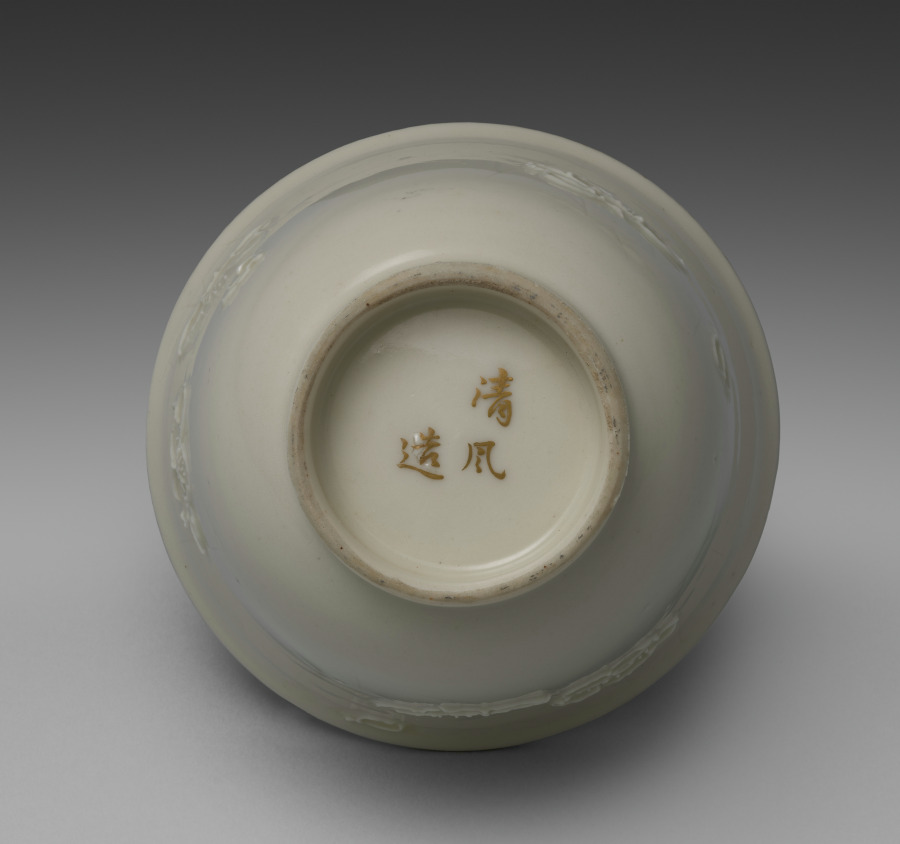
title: Drinking Cup from Dining Set with Plum Blossoms and Cracked-Ice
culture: Japan, Meiji period (1868–1912)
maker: Seifū Yohei II (Japanese, 1844–1878)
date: c. 1875–78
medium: Porcelain with molded designs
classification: Ceramic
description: Each item in this set has a delicate low-relief design of flowering plum branches over scattered, intersecting lines meant to resemble the cracked-ice surface of a frozen body of water and is signed on the base in gold pigment. While Yohei II produced many fine works in underglaze blue, like those produced by Kiyomizu Shichibei, he also made works in quite different styles later in his career, from the early 1870 s. In 1873, he was appointed purveyor to the Industrial Center of Kyoto Prefecture, a designation associated with Kyoto’s efforts to reach an international market through the port of Kobe; and from 1875 until his death, he was involved in national-level projects to present Japanese ceramics across the world. It was during this period that Yohei III was apprenticed to Yohei II, and it has been suggested that this set may in fact be an early example of Yohei III’s work, which he signed with his teacher’s name. Decorated with flowers resembling Japanese textile motifs, the set calls to mind the design of Yohei II’s pair of vases with plum blossoms in the Victoria and Albert Museum. Here, the elaborate trees created for a formal public exhibition setting have been translated into the approachable blossoms of the genteel domestic environment. While the designs are consistent across the pieces, each raised flower petal and pistil and each incised line in the ice was done by hand, so the cups, bowls, and dishes are similar yet unique. The bottoms of two boxes once identified the set’s owner, but the information has been deliberately obscured with black ink. However, inscriptions still visible appear to indicate two occasions, once at the end of July 1886 , and once again in June 1916 , when parts of the set were requested from Hokura in Niigata Prefecture. The location corresponds to a neighborhood in the present-day city of Jōetsu. The surname Tsuji 辻 also appears on a paper tag affixed to one of the box cloths. Future research may possibly reveal more about their provenance. A vase by Yohei III in a private collection combines the formal grandeur of the Yohei II vases in the Victoria and Albert Museum with the gentler design of this dining set, placing flowering plum trees against soft, scalloped-edge clouds resembling those in golden screens.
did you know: The dining wares have a creamy white coloration that the four boxes containing them identify as Korean in style.